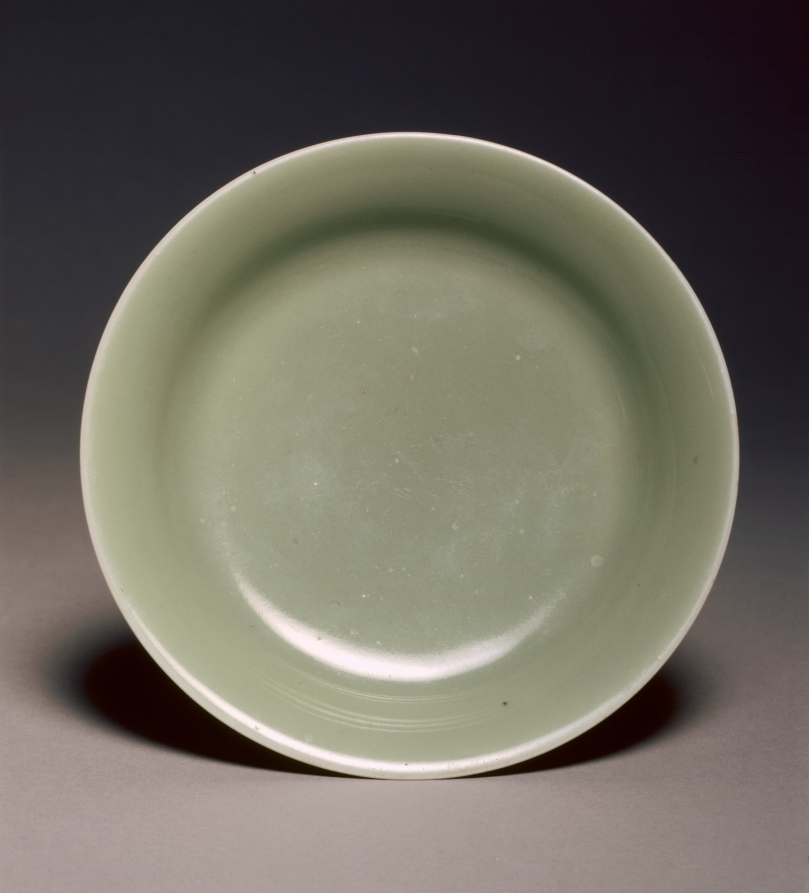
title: Plate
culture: China, Qing dynasty (1644–1911), Qianlong reign (1736–95)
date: 1736–95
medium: porcelain, with celadon glaze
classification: Ceramic